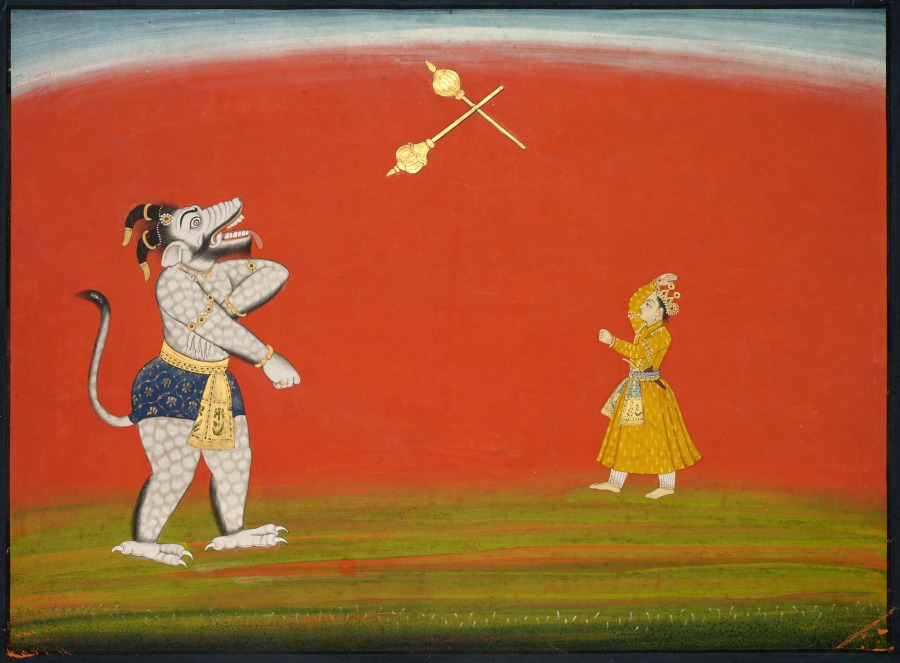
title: Pradyumna and Samvara fight with maces, from the "Large Basohli Bhagavata Purana"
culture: Northern India, Pahari kingdoms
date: c. 1760–65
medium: Gum tempera, ink, and gold on paper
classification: Painting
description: The demon on the left is Samvara. He heard a prophecy that Pradyumna, the son of Krishna and Rukmini, would one day murder him. Hearing this, Samvara kidnapped Pradyumna when he was an infant and threw him into the ocean, where he was swallowed by a fish. The fish was caught and brought to Samvara’s kitchen, where Mayavati discovered him still alive in the belly of the fish. She raised him; he slayed the demon and married Mayavati.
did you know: Pradyumna is the incarnation (avatar) of Kama, the god of erotic love.